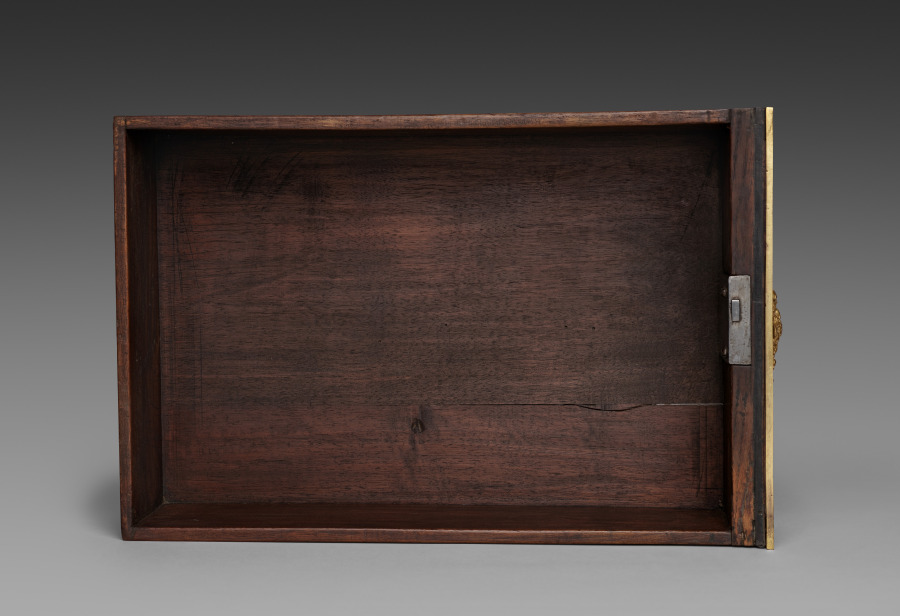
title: Side Drawer for Cabinet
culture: France, late 17th Century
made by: André-Charles Boulle (French, 1642–1732)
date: c. 1690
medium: ebony, marquetry in metal and tortoise shell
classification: Furniture and woodwork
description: Appointed cabinetmaker to King Louis XIV in 1672, André-Charles Boulle became a master of furniture making in France during the late 1600s until his death in 1732. Known primarily for his use of marquetry, in which metal patterns are inlaid into tortoiseshell then applied within the veneered surface of the furniture, Boulle established a level of quality and craftsmanship few others could achieve. As a result, his work found favor at the royal court and among other aristocrats and diplomats eager to impress the king. The inclusion of a medallion depicting Louis XIV within the bronze decoration of this chest would have identified the owner with the royal court. Often exhibiting stout architectural proportions with elegant groups of inlaid motifs such as the parrot on the central panel of this chest, Boulle’s designs are an example of the intellectual fashion for contrasting ideas, materials, and motifs.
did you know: Originally designed to sit atop an elaborate tall stand, this chest was likely altered in the late 1700s to reduce its scale and height.